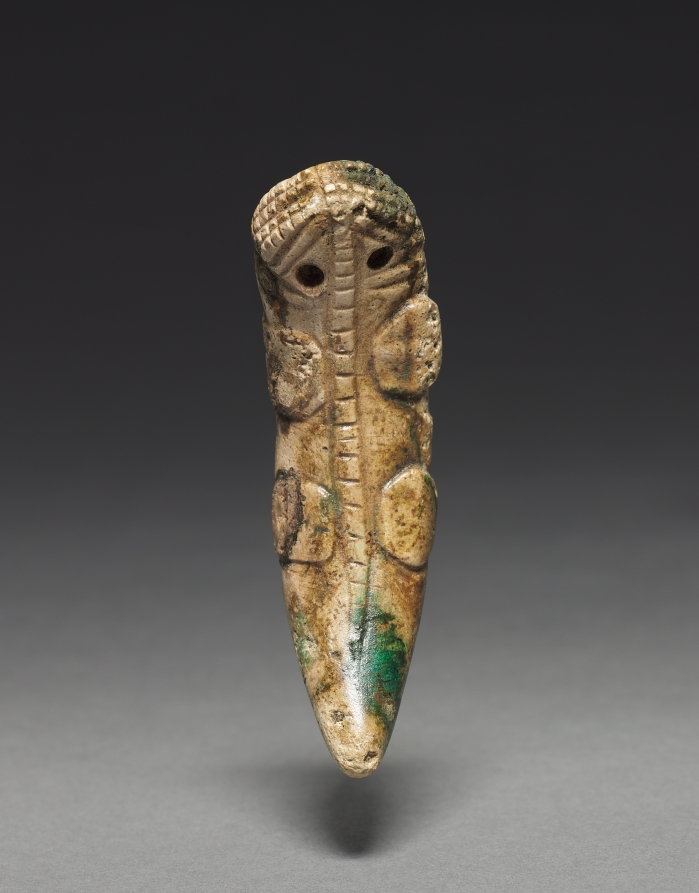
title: Reptile Pendant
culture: Central Panama, (Azuero Peninsula), c. 700-1550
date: c. 700–1550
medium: limestone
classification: Sculpture